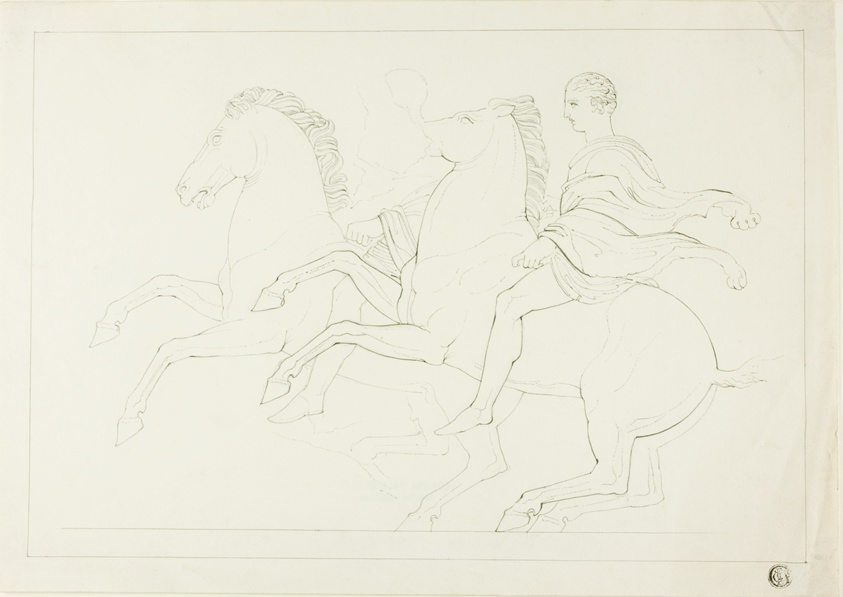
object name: Drawing and Watercolor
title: Copy of Calvary from the Parthenon Frieze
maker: Possibly John Flaxman, II; English, 1755-1826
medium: Pen and black ink, over traces of graphite, on ivory wove paper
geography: England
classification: pen and ink drawings; drawings (visual works); prints and drawing